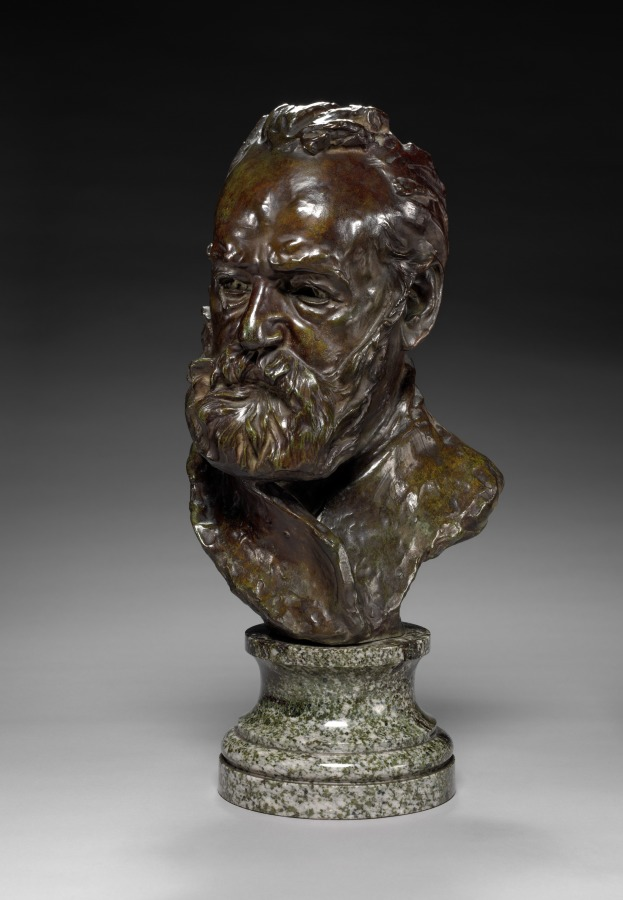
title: Bust of Victor Hugo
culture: France, 19th century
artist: Auguste Rodin (French, 1840–1917)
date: 1883 modeled; cast by 1917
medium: bronze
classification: Sculpture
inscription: inscribed on back: "A. Rodin" signed "Rodin" (back, lower left)